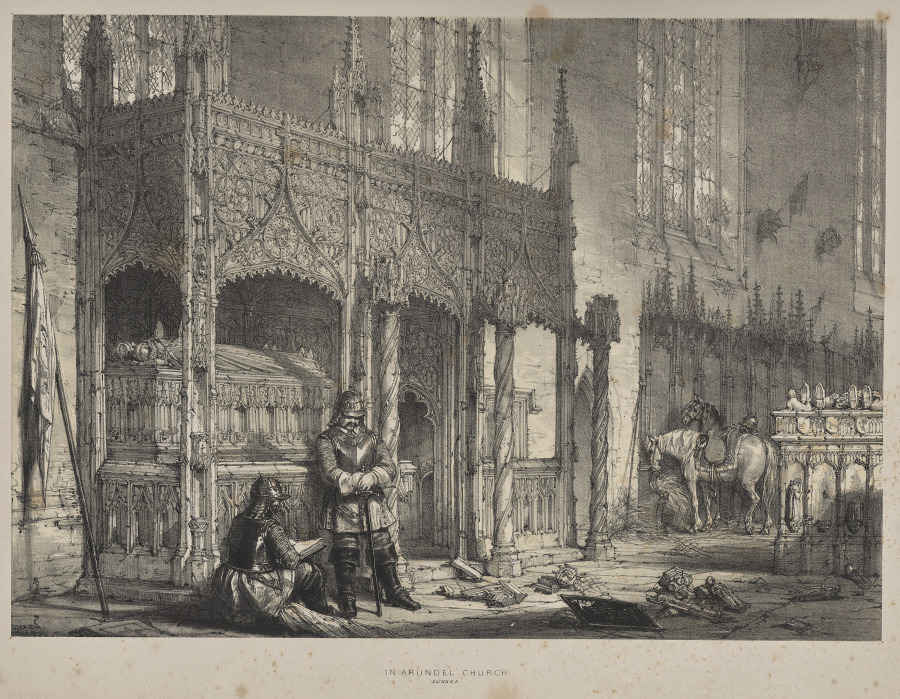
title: Architecture of the Middle Ages: In Arundel Church, Sussex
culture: England, 19th century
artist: Joseph Nash (British, 1808–1878)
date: 1832 (?)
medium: lithograph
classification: Print